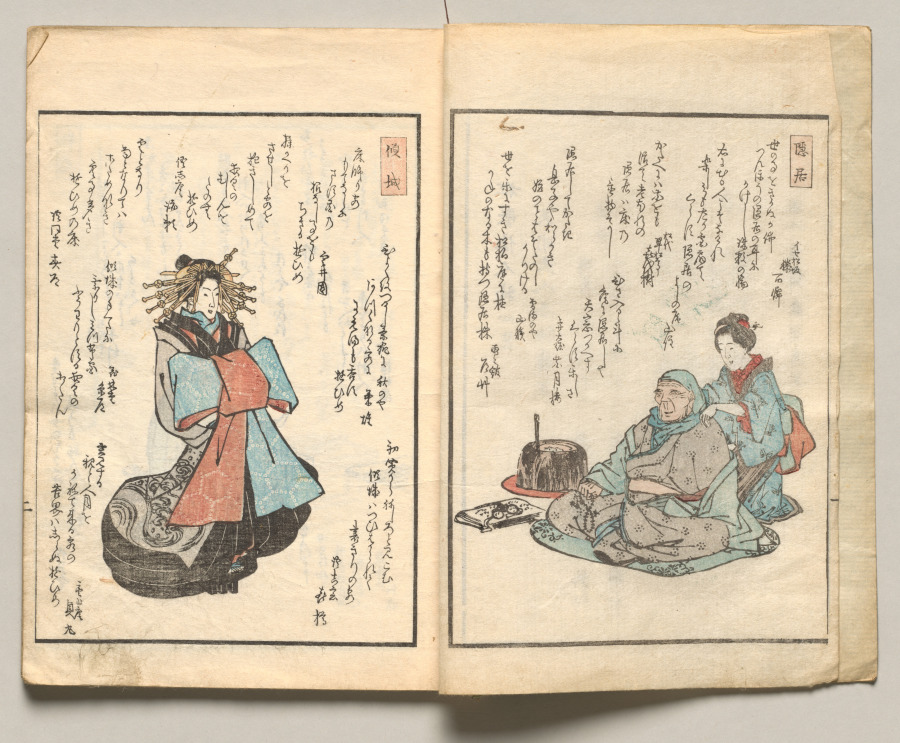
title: Spread Two from Volume Four of People of Japan in Light Verse (Kyōka)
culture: Japan, Edo period (1615–1868)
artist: Utagawa Hiroshige (Japanese, 1797–1858)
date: 1857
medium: Woodblock-printed book; ink and color on paper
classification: Bound Volume